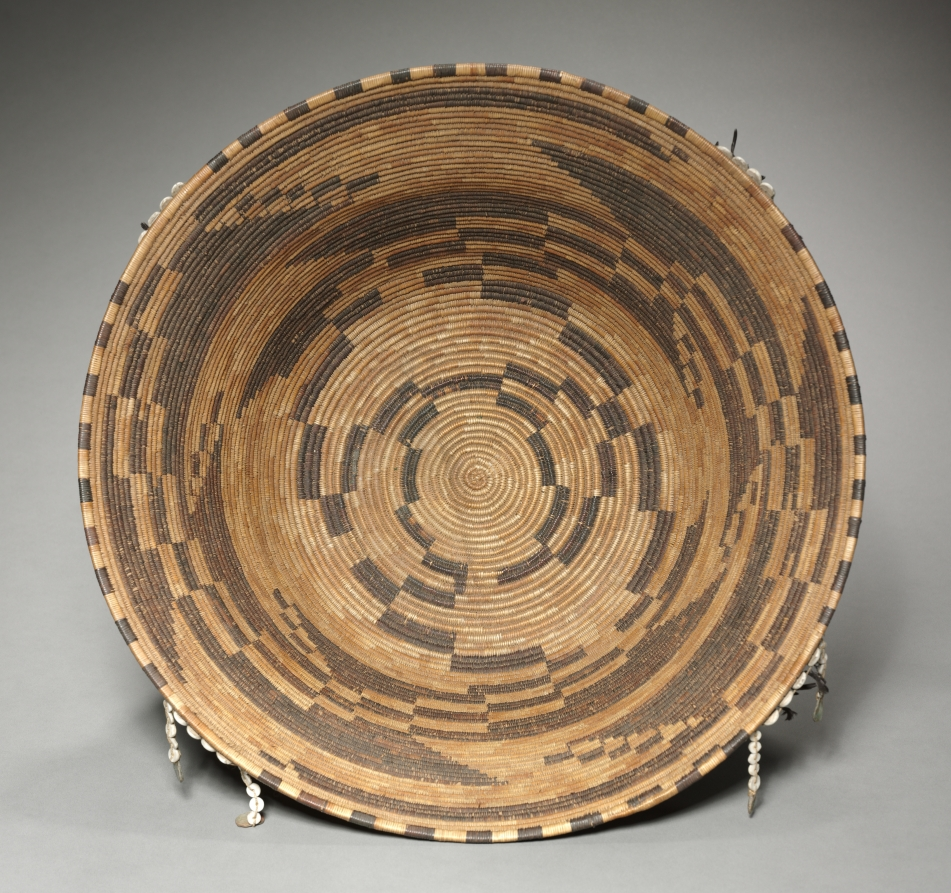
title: Puberty Basket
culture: California, Pomo, late 19th century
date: 1890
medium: coiled, quail and woodpecker feathers, shell, abalone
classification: Basketry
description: This finely woven basin is based on a traditional form that young Pomo women used to wash themselves after ceremonial seclusion following their first menses. The example on display, however, was made for the outside market.